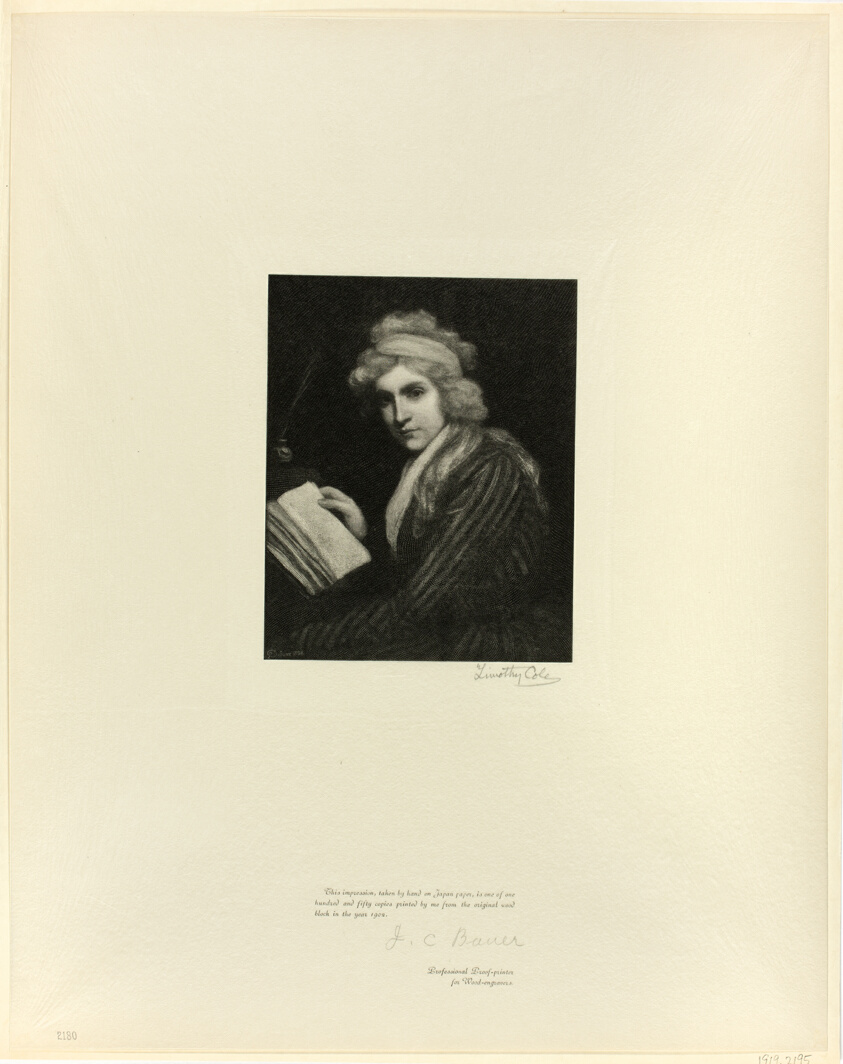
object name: Print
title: Portrait of Mary Wollstonecraft, from Old English Masters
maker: Timothy Cole (American, born England, 1852-1931); after John Opie (English, 1761-1807)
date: 1899, printed 1902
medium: Wood engraving on chine paper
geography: United States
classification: wood engraving; print; prints and drawing